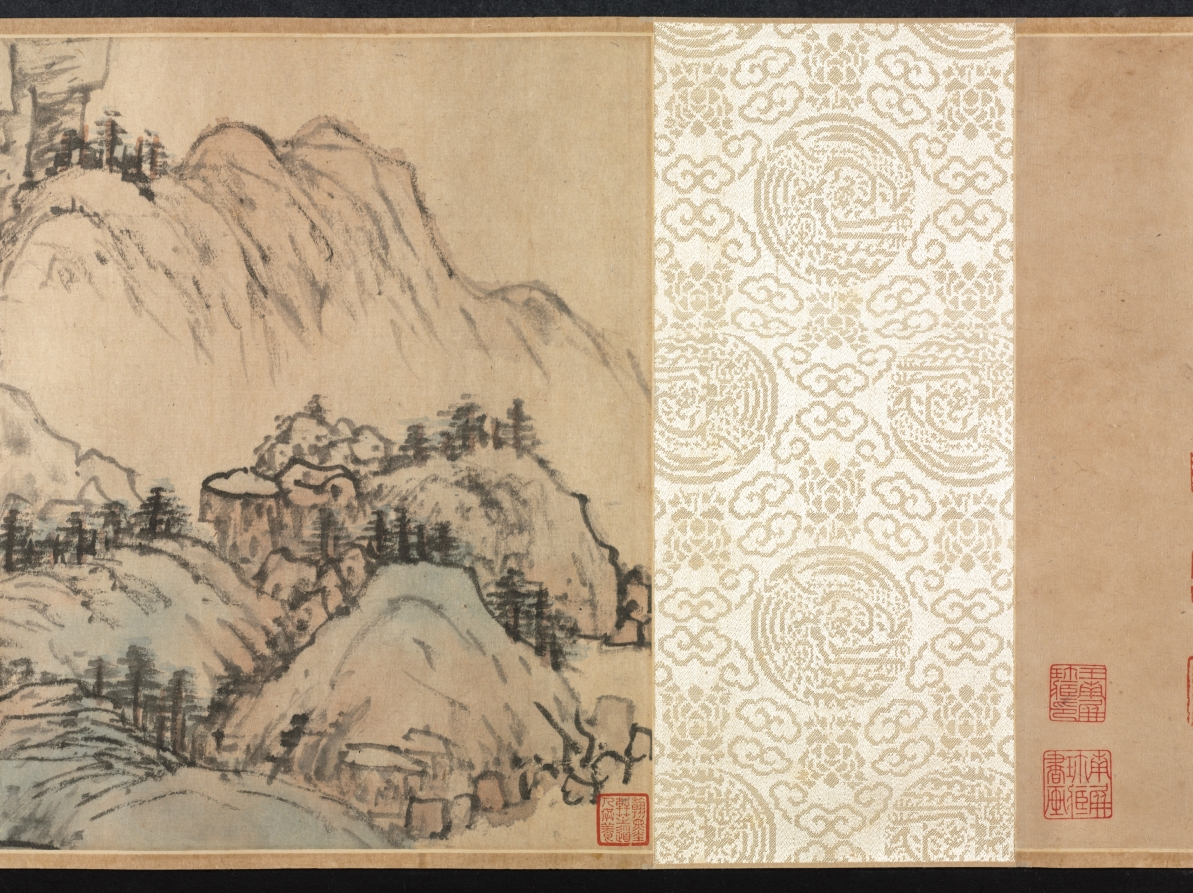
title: Dream Journey among Rivers and Mountains, no. 90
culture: China, Qing dynasty (1644-1911)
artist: Cheng Zhengkui (Chinese, 1604–1676)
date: 1658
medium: Handscroll; ink and color on paper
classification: Painting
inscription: 江山臥遊圖其九十, 青溪道人, 戊戌夏五。 [印] 程正揆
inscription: Title and inscription by Huang Yi 黃易 (1744–1802), and 3 seals.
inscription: 1 colophon and 9 additional seals: 3 seals of Dai Zhi 戴植 (active about 1821–1850); 1 colophon, dated 1914, and 3 seals of Yan Shiqing 顏世清 (1873–1929); 3 seals of Wang Nanping 王南屏 (1924–1985).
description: Cliffs and waterfalls interspersed with trees and dotted vegetation are spread over this handscroll. Long paths wind their way through villages, beside cottages, shrines, and over bridges. In the past, Chinese literati officials liked to take a “dream journey” along mountains and rivers when viewing landscape paintings in their studios. Scenery of this kind thus became a way to escape from the world of bureaucracy and administration. The painter Cheng Zhengkui used the title “Dream Journey” for a whole series of paintings, of which this is number 90. He is said to have painted 500 of them, but the actual count remains unknown.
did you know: Cheng Zhengkui planned to make 100 dream journey paintings but may have ultimately made 500.